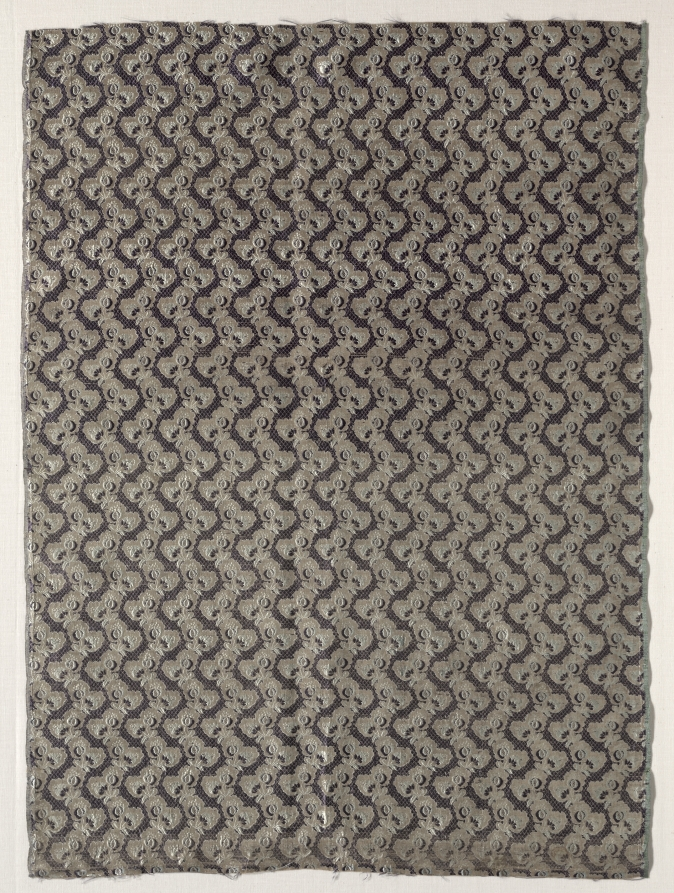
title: Length of Textile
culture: France, 18th century, period of Louis XVI (1774-1793)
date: 1774–1793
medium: plain cloth; lancée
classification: Textile